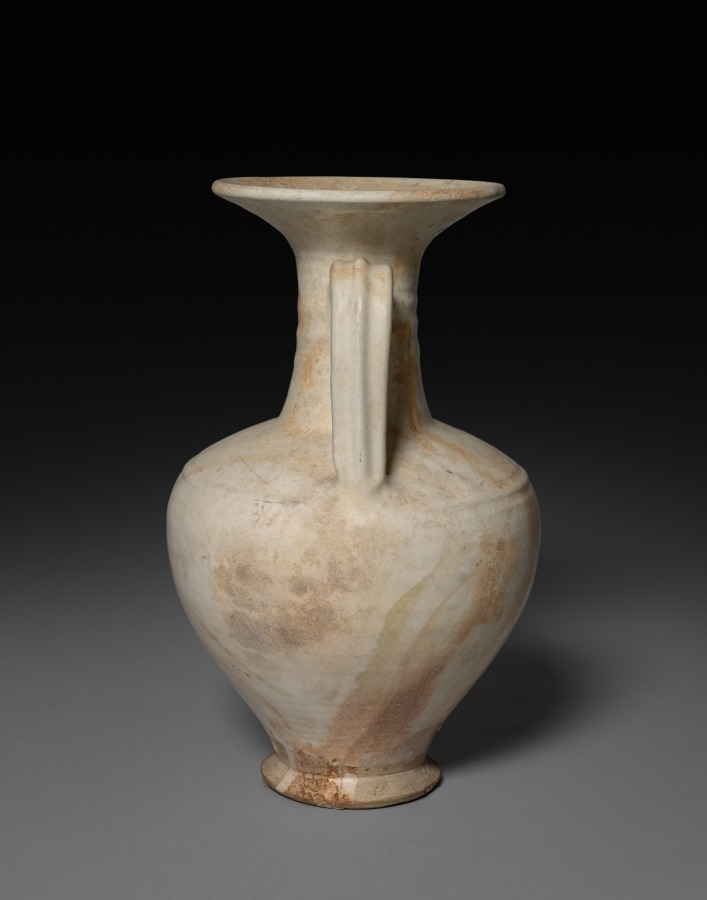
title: Ewer: Cizhou ware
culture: China, Northern Song dynasty (960-1127)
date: 1105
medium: buff stoneware with underglaze slip coating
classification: Ceramic